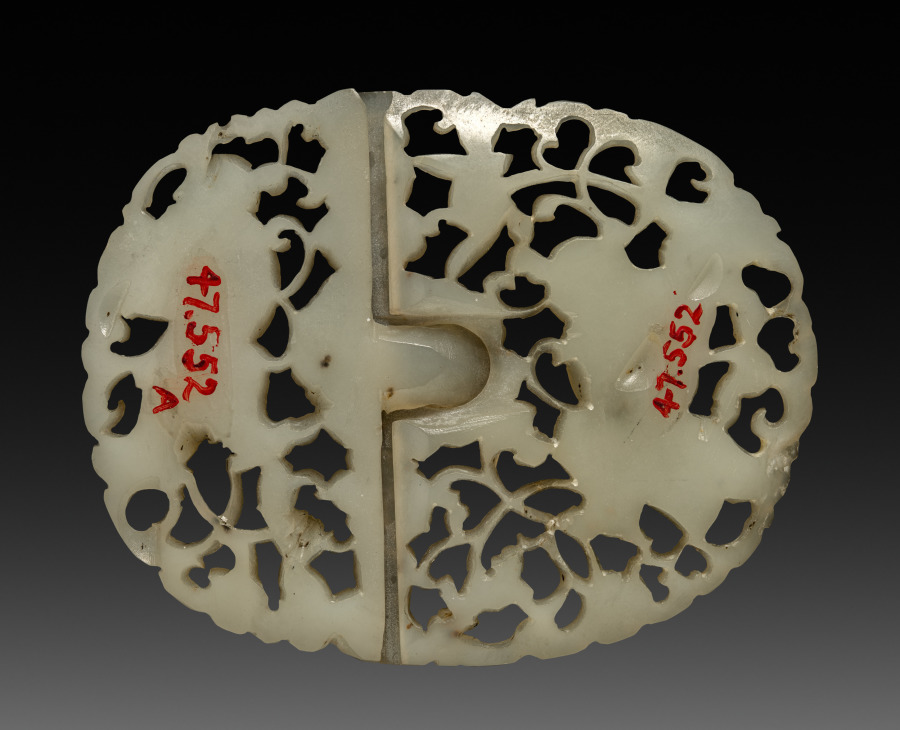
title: Buckle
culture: China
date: 1800s–1900s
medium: white jade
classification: Jewelry